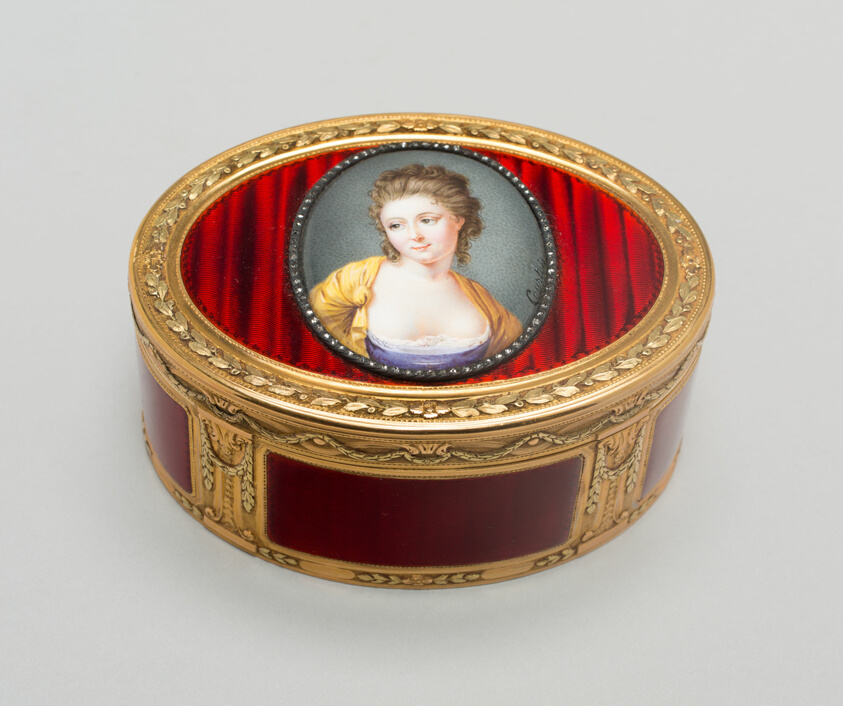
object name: Metalwork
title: Snuff Box: Portrait of Duchess of Marlborough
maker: Nicolas André Courtois; French, 1734-1806; Paris, France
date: c. 1775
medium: Gold, enamel, and diamonds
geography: Paris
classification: snuff box; european decorative arts; metalwork